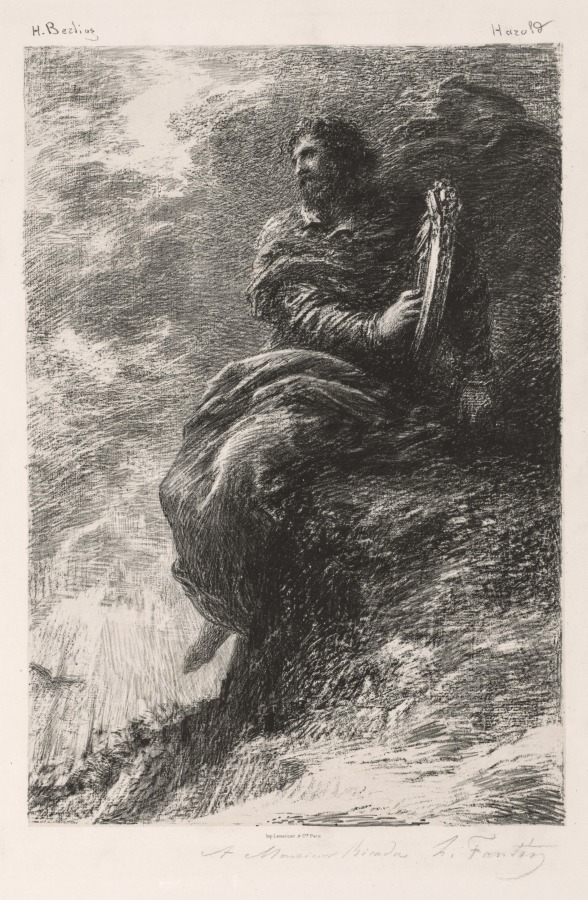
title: Harolde dans les Montagnes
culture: France, 19th century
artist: Henri Fantin-Latour (French, 1836–1904)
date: 1884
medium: lithograph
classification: Print